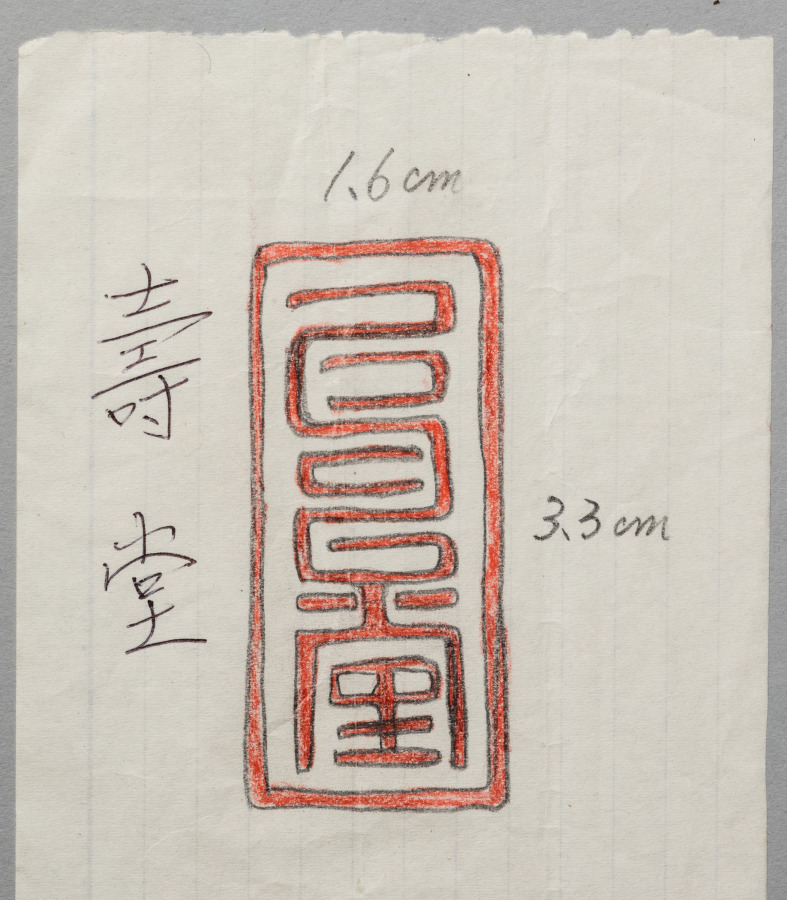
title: Landscape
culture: Japan, Muromachi period (1392–1573)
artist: Judō (Japanese, active 16th century)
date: 1500s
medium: hanging scroll, ink and light color on paper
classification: Painting